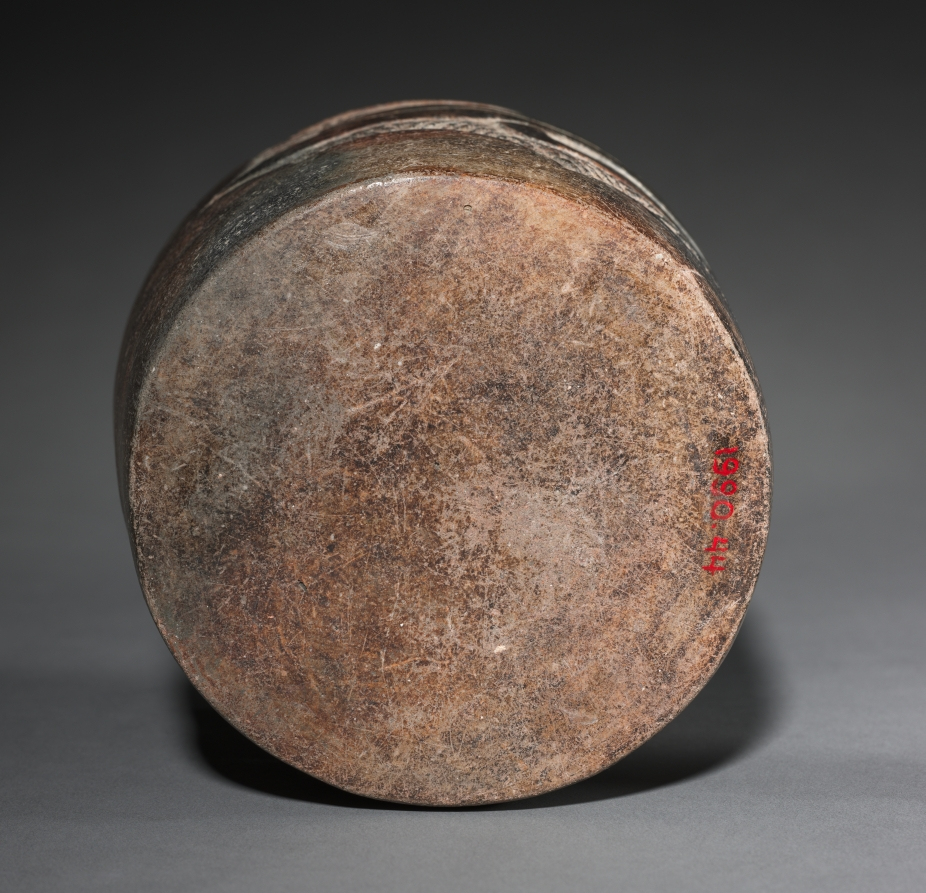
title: Carved Bowl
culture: Mexico, Central Highlands, Olmec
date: 1200–900 BCE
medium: earthenware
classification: Ceramic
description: Although the Olmec heartland is located on Mexico's Gulf Coast, sites with Olmec-style architecture and sculpture are also found in the highlands of Central Mexico. Small-scale Olmec works in jade and pottery are even more widely distributed; their ownership probably conferred great prestige.